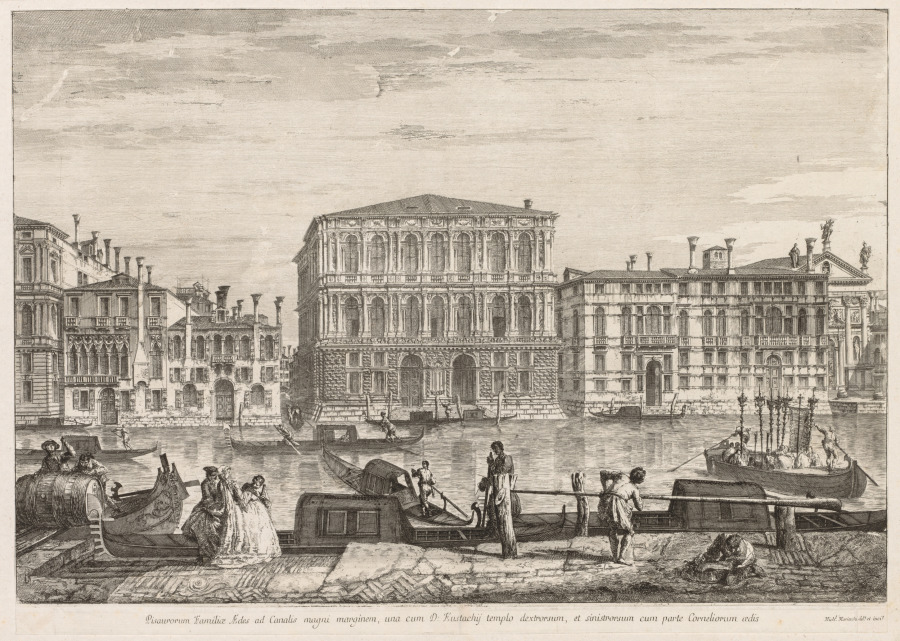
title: Views of Venice: Palazzo Pesaro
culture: Italy, 17th century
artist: Michele Marieschi (Italian, 1710–1743)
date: 1741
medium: etching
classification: Print